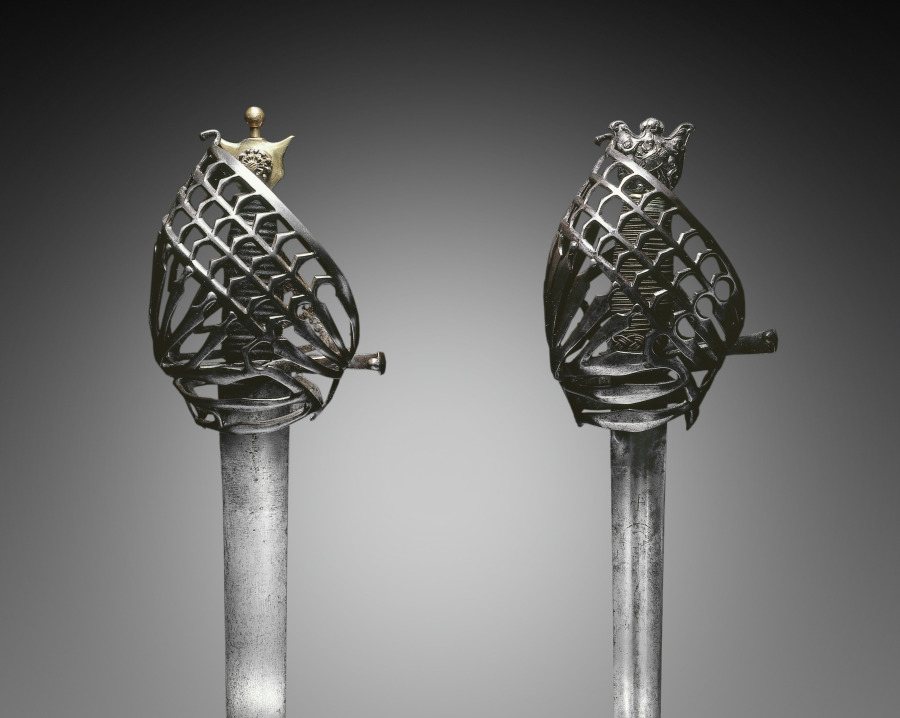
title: Schiavona Broadsword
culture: Italy, Venice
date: early 1700s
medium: steel, leather, wood, brass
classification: Arms and Armor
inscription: blade inscribed: POTZDAM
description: The schiavona-type broadsword features a complex barred guard that slopes forward. Its name derives from the Italian word for "Slavonic" and refers to the Slavonian corps who served as bodyguards to the Doge of Venice until the end of the Venetian Republic in 1797. Such swords were popular mainly with Venetians.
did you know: Usually used by the military, a broadsword has a straight, wide, two-edged blade a with basket-shaped guard that helps protect the hand.